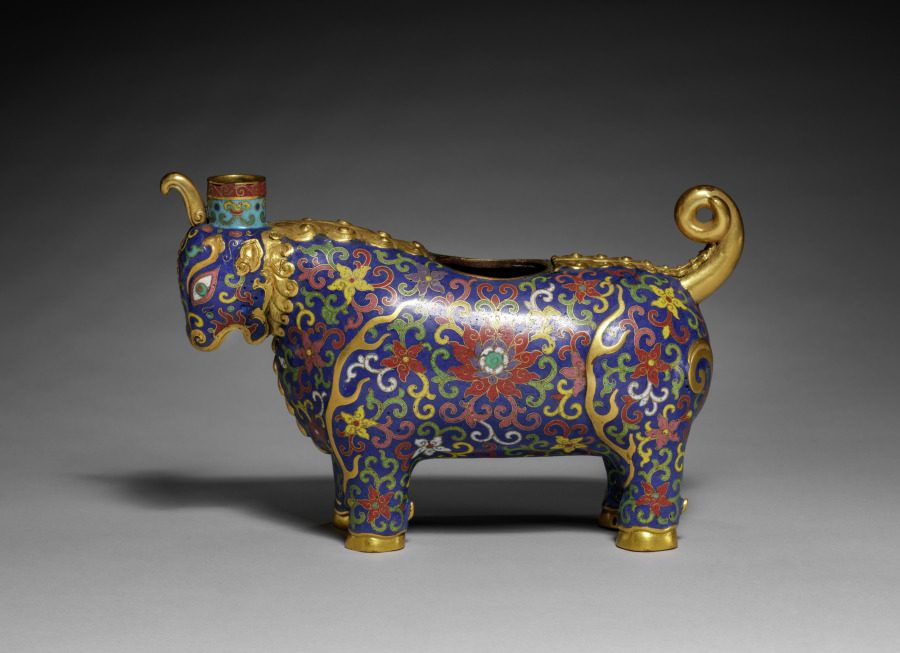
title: Container in the Form of a Unicorn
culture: China, Qing dynasty (1644-1911), Qianlong mark and reign (1736-95)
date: 1736–95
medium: cloisonné enamel and gilt copper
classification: Enamel